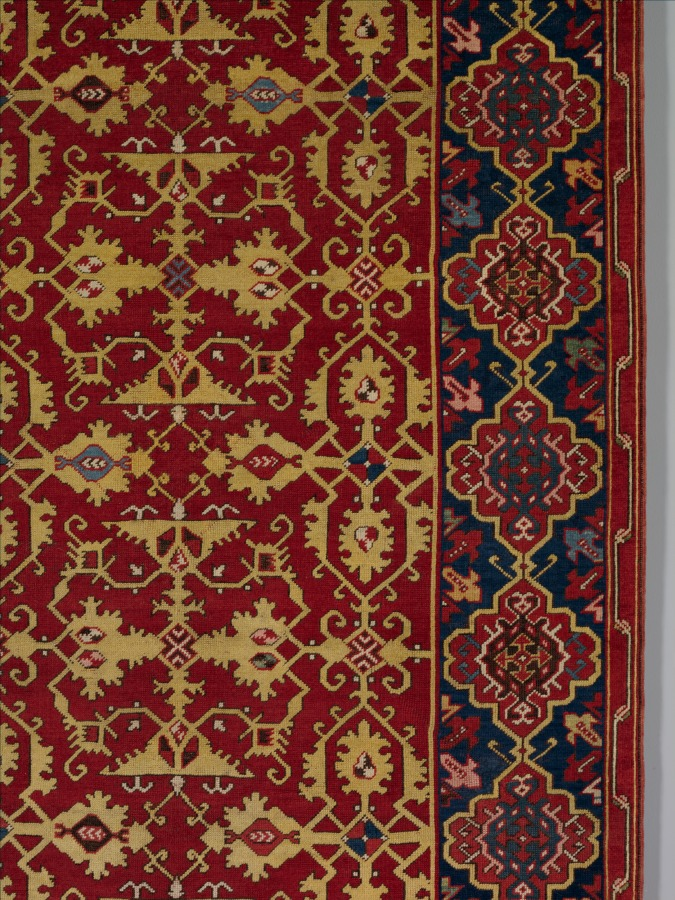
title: Classical Turkish Carpet with the Lotto Pattern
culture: Turkey, Ushak, Ottoman period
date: 1600–1650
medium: wool: symmetrical rug knot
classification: Textile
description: Lotto carpets have consistent color combinations and striking designs traceable to sources in Central Asia. In the central field, stylized yellow leaf patterns stand out against a red ground. The border is filled with cartouches on a dark blue background, and a simplified vine meanders along the outermost edge. In Islamic contexts, these vegetal patterns evoke paradise. Made primarily for export in the western Turkish center of Ushak between the 1400s and 1600s, Lotto carpets were named after the Venetian painter Lorenzo Lotto (1480–1556), who amply documented in oil paintings the way Europeans displayed this type of Turkish carpet as a sign of wealth and prestige. To preserve them, Europeans displayed Lotto carpets on tables, though they were originally made for use on the floor.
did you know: Lotto carpets were depicted in some 200 paintings during the 16th century in the Netherlands.